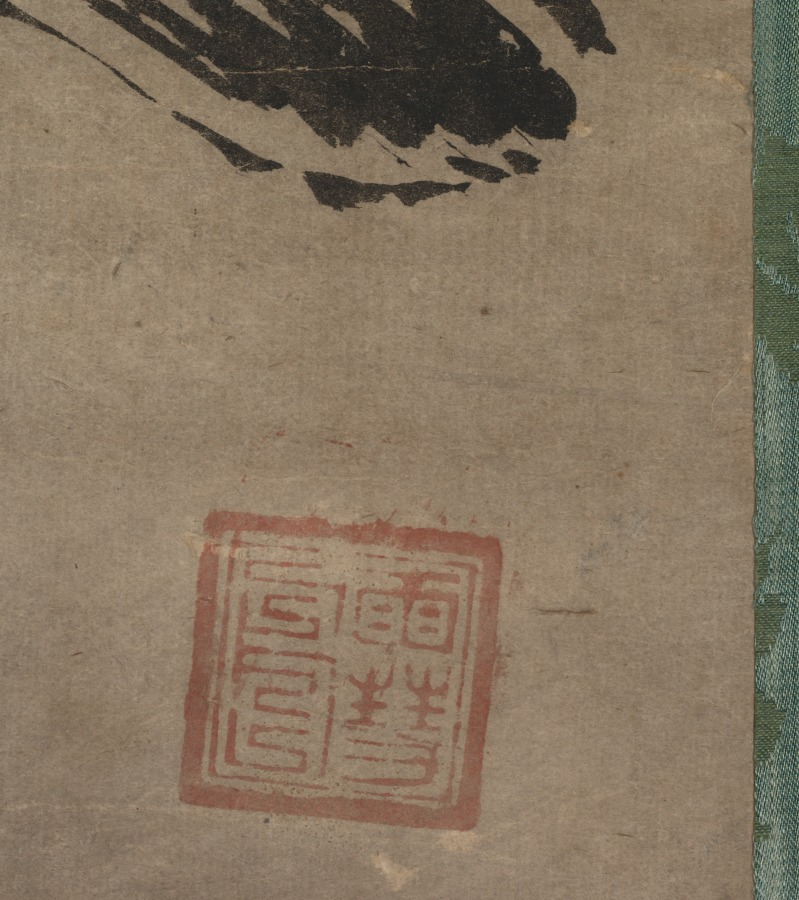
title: Goose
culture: Japan, Edo period (1615–1868)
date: c. 1615–99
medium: hanging scroll; ink on paper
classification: Painting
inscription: spurious seal of Sesshu, lower right.